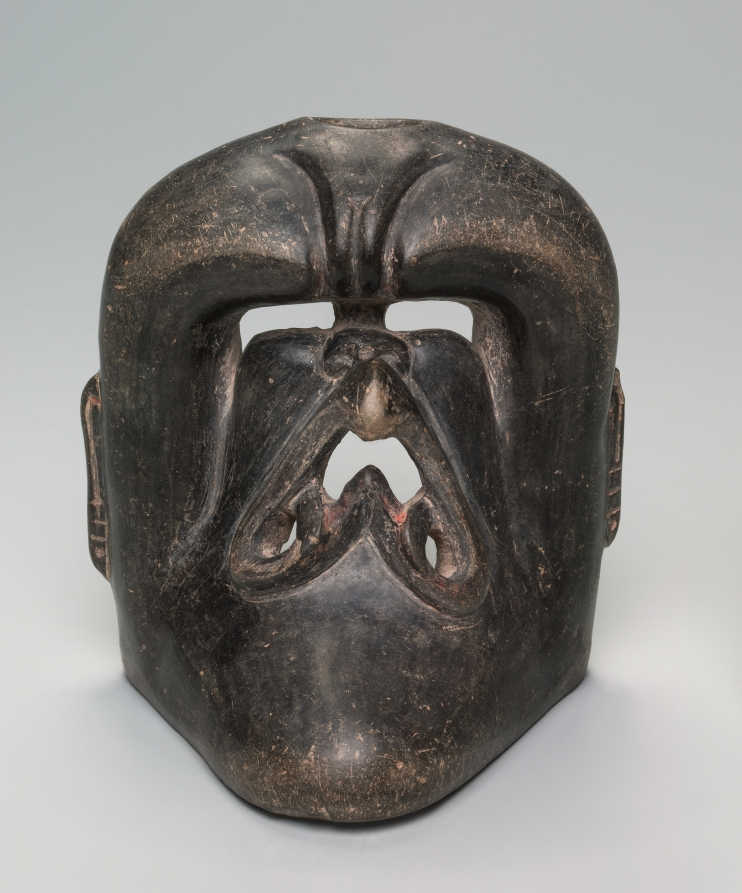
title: Vessel with Deity Mask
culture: Central Mexico (Las Bocas, Puebla?), Olmec, Formative Period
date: 1200–900 BCE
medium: ceramic, traces of pigment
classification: Ceramic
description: This unusual vessel is made of a U-shaped container and a sheet of clay modeled as a deity mask that is startling in its power: pierced eyes glare from the shadow of a muscular brow; the chin juts aggressively; and the part-bird, part-jaguar mouth opens in a shriek. This may be the face of the Olmec rain deity, the inspiration for much Olmec ritual and many accomplished works of art. The vessel may come from a grave or a buried offering.